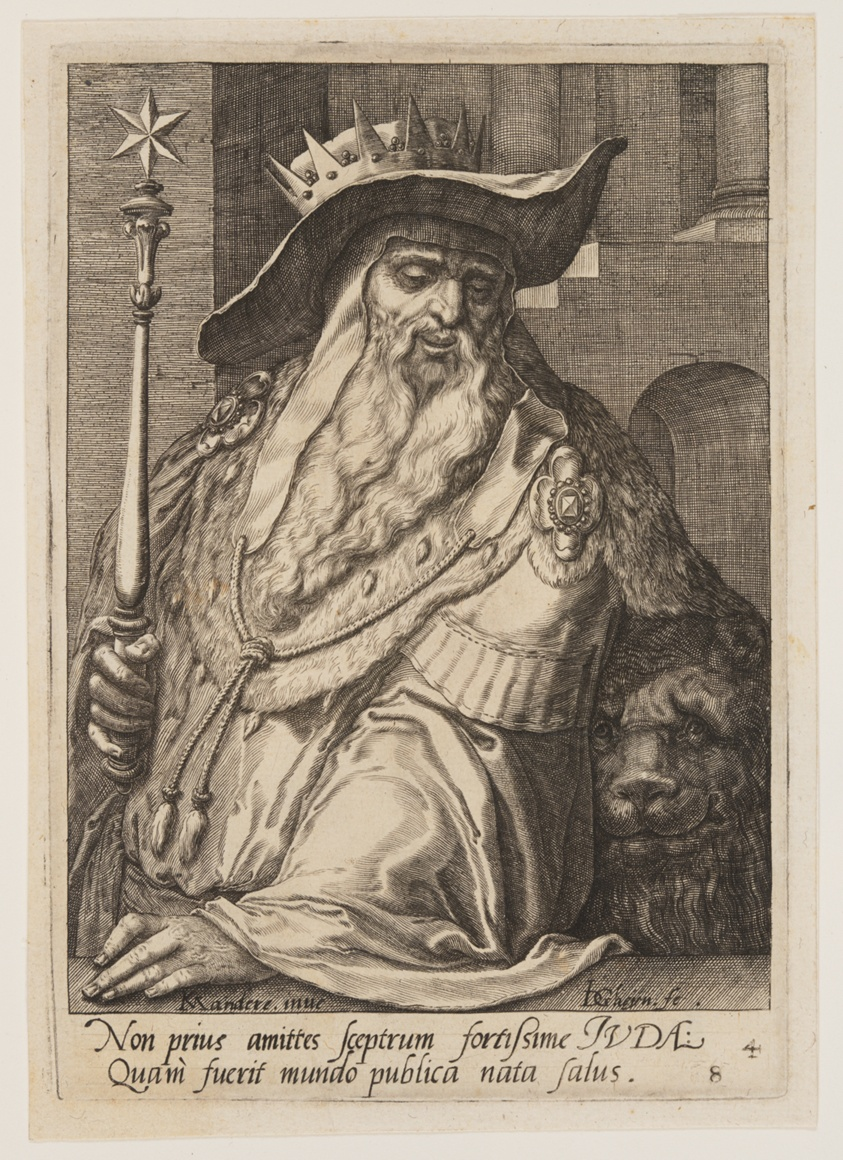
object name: Print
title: Judah, from The Twelve Sons of Jacob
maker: Jacques de Gheyn II (Dutch, 1565–1629); after Karel van Mander (Dutch, 1548–1606)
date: c. 1589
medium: Engraving on ivory laid paper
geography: Netherlands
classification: engraving; paper; print; prints and drawing